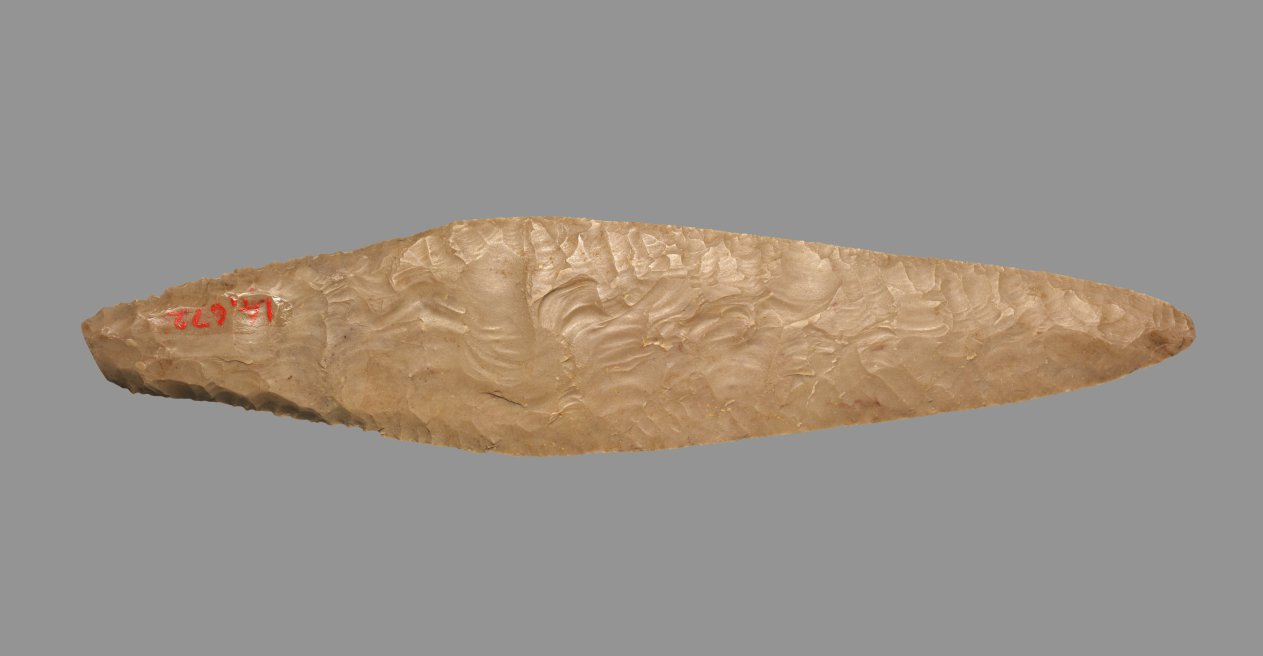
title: Rhomboidal Knife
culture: Egypt, Predynastic (5000–2950 BCE), Naqada Ia–b (3900–3500 BCE)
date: 4500–3500 BCE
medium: light brown flint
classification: Implements